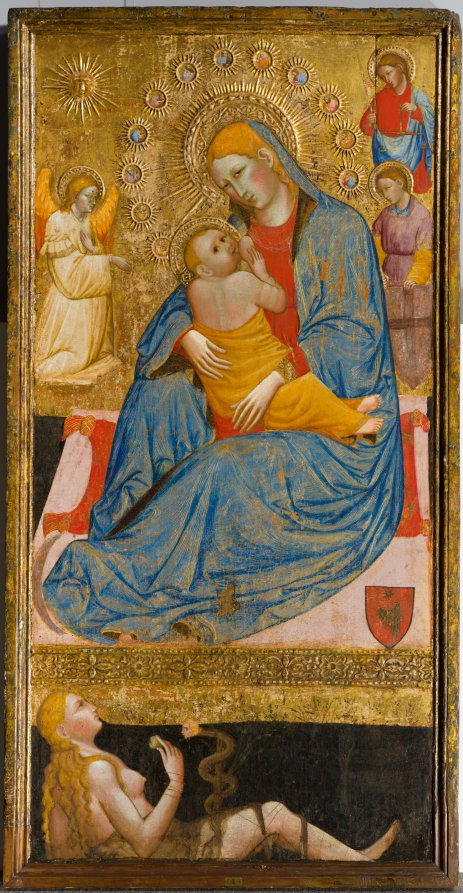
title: The Madonna of Humility with the Temptation of Eve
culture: Italy, the Marches, late 14th-early 15th Century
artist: Olivuccio di Ciccarello (Italian, Marche, 1360/65–1439)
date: c. 1400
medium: tempera and gold on wood panel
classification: Painting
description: The Madonna is seated humbly on the ground nursing her child. Saint George and the Archangels Gabriel and Michael kneel nearby, while Christ’s disciples appear radiating from the Madonna’s halo in the form of stars. In contrast with the Virgin’s purity, Eve lies in the lower part of the painting. Coaxed by the serpent, she raises the forbidden fruit to her mouth, thus condemning humankind through her original sin. The juxtaposition of these two images affirms the Incarnation and the role of Christ and the Virgin in the redemption story. The deep scratches on the surface of the panel, especially on the serpent’s face and Eve’s wrist, likely resulted from a zealous Christian’s symbolic attack on the power of evil. The artist, Olivuccio di Ciccarello, is known to have been active in the Marche in central Italy. Little is known of his life except that he was an important and prolific painter in Ancona, where he died. His paintings were formerly attributed to Carlo da Camerino, an apparently nonexistent artist, on the basis of a mistaken reading of his signature on a crucifix.